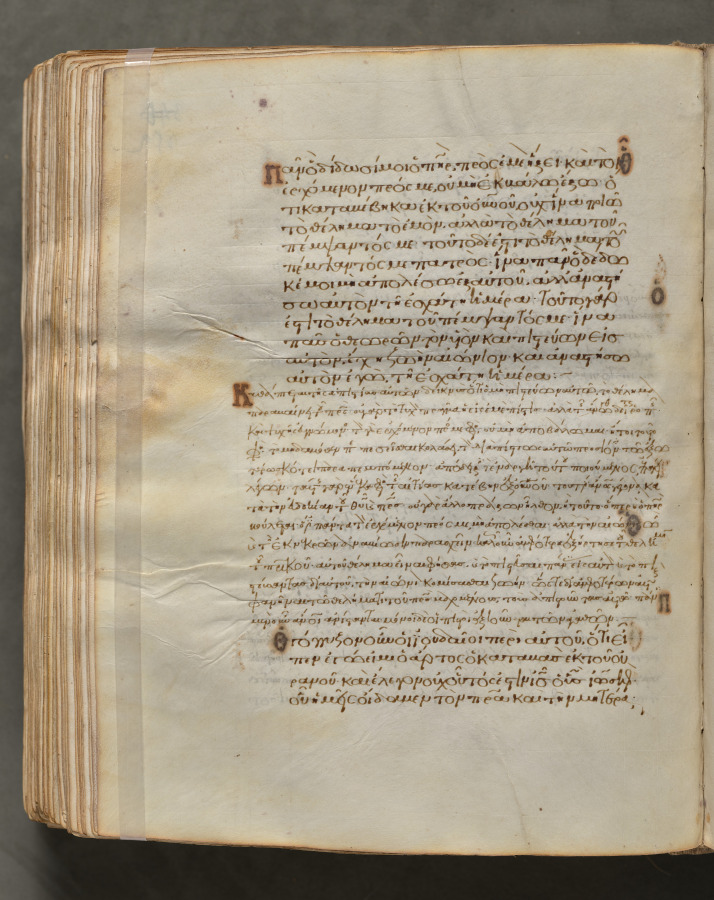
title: Text, folio 352 (verso), from a Gospel Book with Commentaries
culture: Byzantium, Constantinople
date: c. 1000–1100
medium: ink, tempera, and gold on vellum; leather binding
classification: Bound Volume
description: Each of the four gospels in this book opens on a page with brilliantly illuminated borders depicting the author of the text as well as birds—principally peacocks, symbols of the immortality of the soul—and fountains, representing the fountain of life and the salvation of the soul. This volume consists of 428 leaves with texts in Greek. Its level of sophistication suggests that it was probably written and decorated in a monastery in Constantinople.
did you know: Gospel books were carried in procession through Byzantine churches.